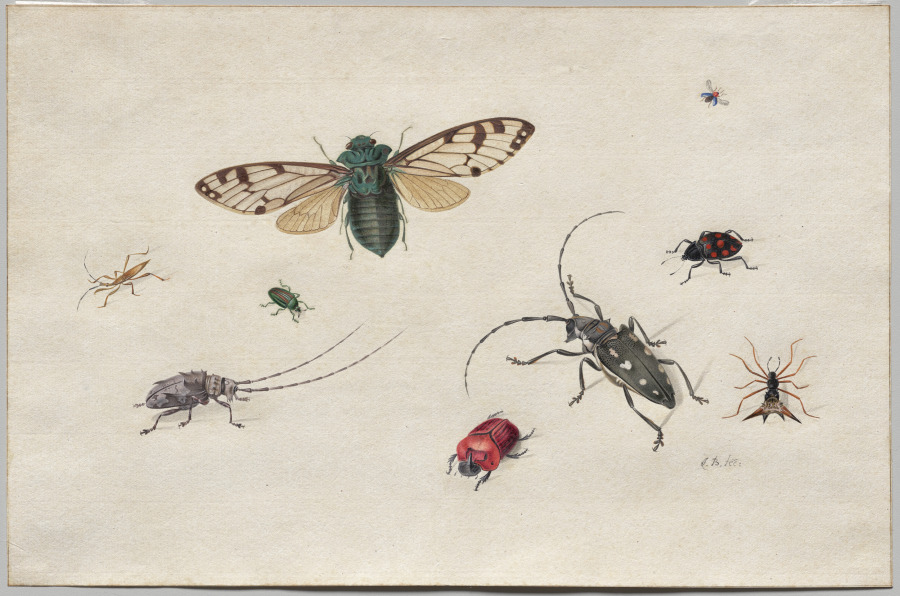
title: Studies of Insects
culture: Netherlands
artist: Johannes Bronckhorst (Netherlands, 1648–1727)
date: c. 1665–1727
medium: watercolor, opaque watercolor, and gum arabic with brown ink framing lines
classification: Drawing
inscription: In graphite on verso: J. Bronckhorst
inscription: In graphite on verso: J. Bronckhorst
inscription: In graphite on verso: 94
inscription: In graphite on verso: 55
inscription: In ink on verso: Collector's stamp, BA or RA (circled)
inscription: In ink on recto: J.B. fec:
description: In the 17th century, an interest in flora and fauna, both local and exotic, in the Netherlands led to vast collections of insects, plants, and animals among academics and amateurs. Artists such as Johannes Bronckhorst became specialists at recording these collections in paint, to be kept in portfolios and shown to visitors. The grouping of insects on this sheet suggest that Bronckhorst had access to a varied collection, and include a cicada, a cereal-leaf beetle, a harlequin ladybird, a spiny orb-weaver spider, two Asian longhorn beetles, a red rhinoceros beetle, a rosemary beetle, and a stick insect. With great attention to detail, Bronckhorst may have selected this particular assembly with no other intent than to create a balanced and colorful composition.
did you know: With an extremely fine brush, the artist used a magnifying glass to draw the minute details of these insects, using watercolor and opaque watercolor, and gum arabic to create sheen.